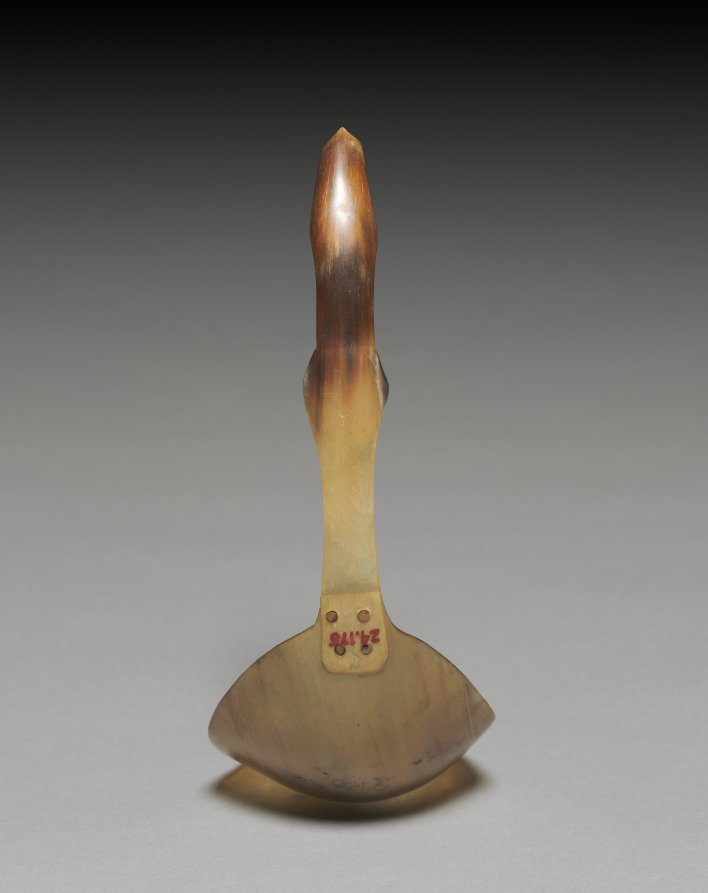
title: Spoon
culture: Native North America, Northwest Coast, Alaska, Tlingit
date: late 1800s–early 1900s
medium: horn, copper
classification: Sculpture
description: Elaborate utensils, valuable possessions of Northwest Coast noble clans, were used during potlatch feasts. This spoon’s handle features the heads of a wolf and a raven along with a beaver’s tail. All may be crests, motifs that, like European heraldry, were exclusive to important families and referred to their histories and rights to control land and resources.